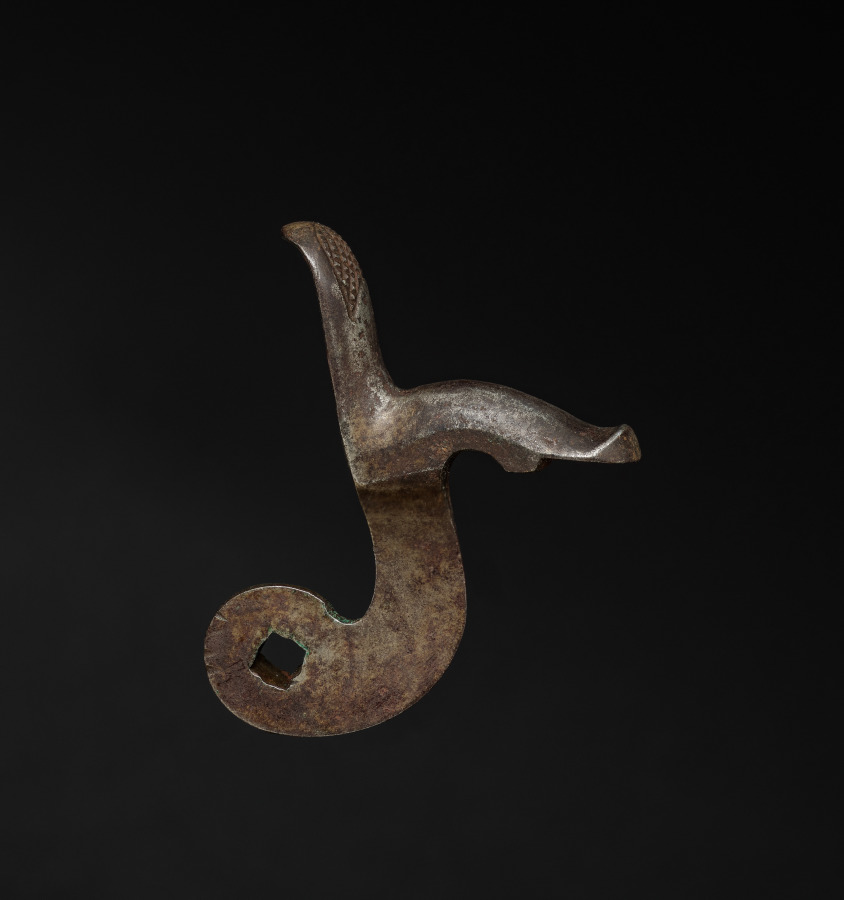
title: Gun-Lock Hammer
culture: England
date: c. 1800–1825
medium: steel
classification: Arms and Armor